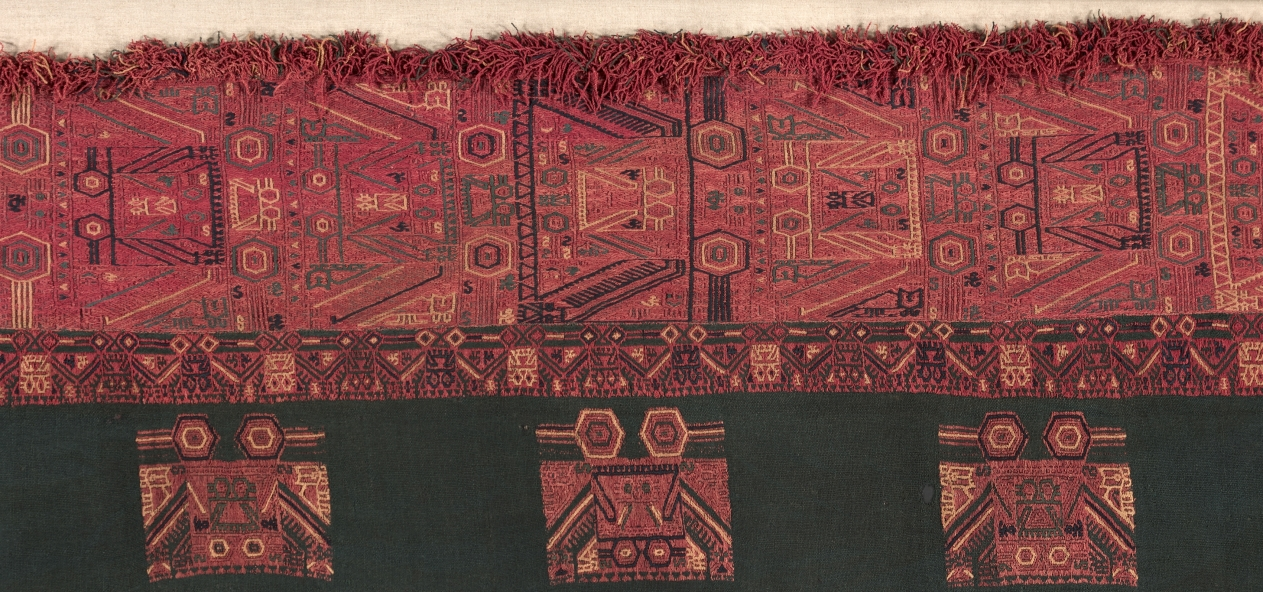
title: Mantle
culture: Peru, South Coast, Paracas (Cavernas) style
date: c. 300 BCE–200 CE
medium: camelid fiber: plain weave with embroidery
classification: Textile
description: Buried in shaft-tombs, or rectangular sunken chambers, the Paracas dead were wrapped in layers of cloth and accompanied by pottery, food, and other offerings. The dry environment of the Paracas Peninsula helped preserve many of these textiles, including richly ornamented garments buried with important individuals. This mantle, probably worn like a cloak, relates closely to the tunic (CMA 1946.227) and long headband (CMA 1946.228) due to their shared imagery. Its double-headed bird motifs— embroidered in vivid red, blue, yellow, and green yarns—likely had symbolic significance, although the specific meaning remains unknown.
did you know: The profusion and decoration of textiles in Paracas burials shows the value placed on cloth.